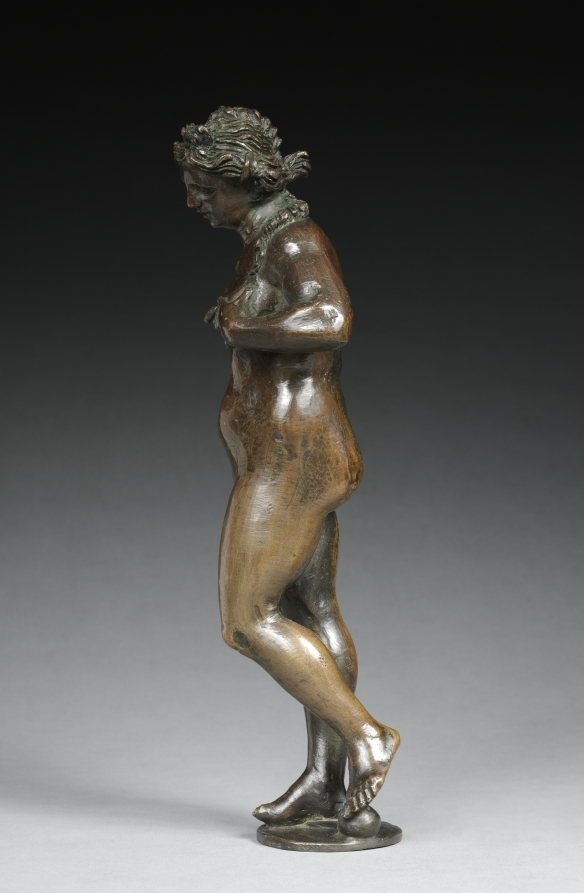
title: Fountain Figure of Abundance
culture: Germany, Augsburg, 16th century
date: c. 1530–40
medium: bronze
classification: Sculpture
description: The spout coming out of the breast indicates that this figure was part of a table fountain--a specialty of Augsburg artists. Her nudity and naturalistic proportions demonstrate the impact of Italian Renaissance art in southern Germany during the early 1500s.